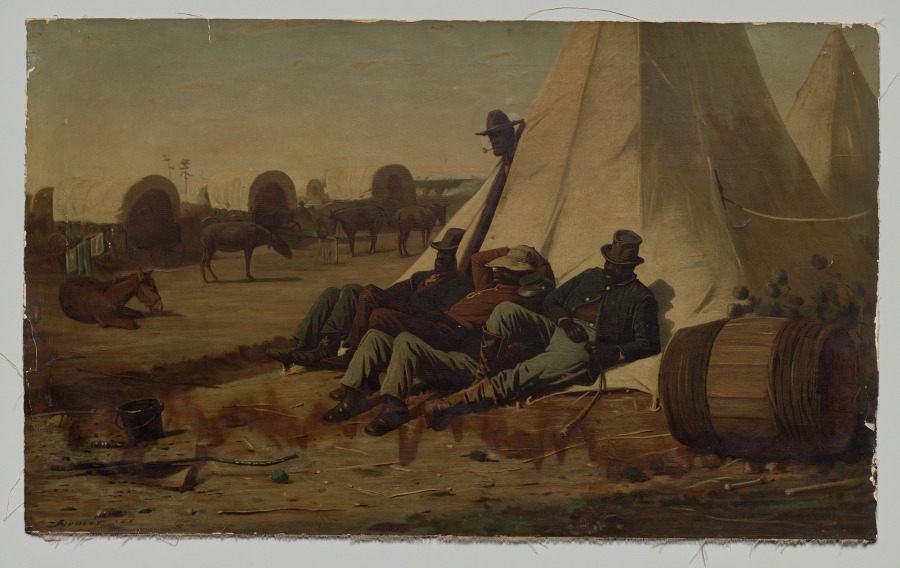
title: The Bright Side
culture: America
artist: Winslow Homer (American, 1836–1910)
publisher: Louis Prang (American, 1824-1909)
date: 1866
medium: lithograph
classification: Print